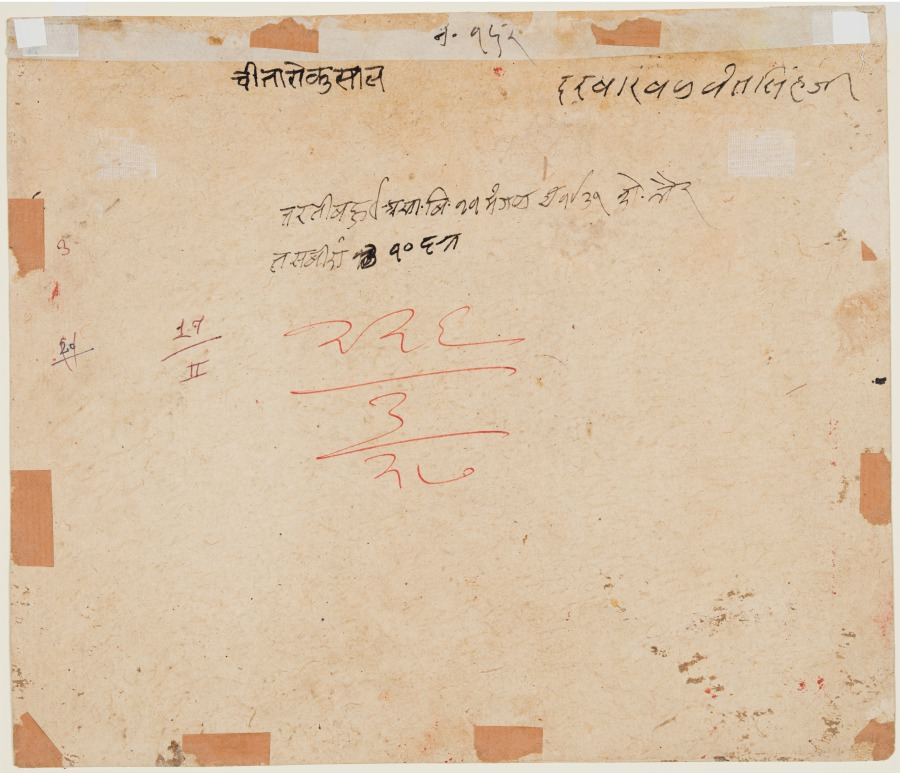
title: Maharaja Balwant Singh of Ratlam (r. 1825–57) in Procession with His Relatives and Courtiers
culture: Northwestern India, Rajasthan, Rajput Kingdom of Devgarh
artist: Kushala (Indian, active c. 1825)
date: 1825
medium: gum tempera, gold and silver on paper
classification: Painting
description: A young raja (king) rides a brown stallion, larger than the others in the center of the composition. The speed of his gallop is indicated by the flying ends of the Raja’s turban. A group of his horsemen turn their heads around to admire his glory, while another party riding behind him follow their king’s lead in obedience.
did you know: The Raja was probably in his early teens when this picture was painted.